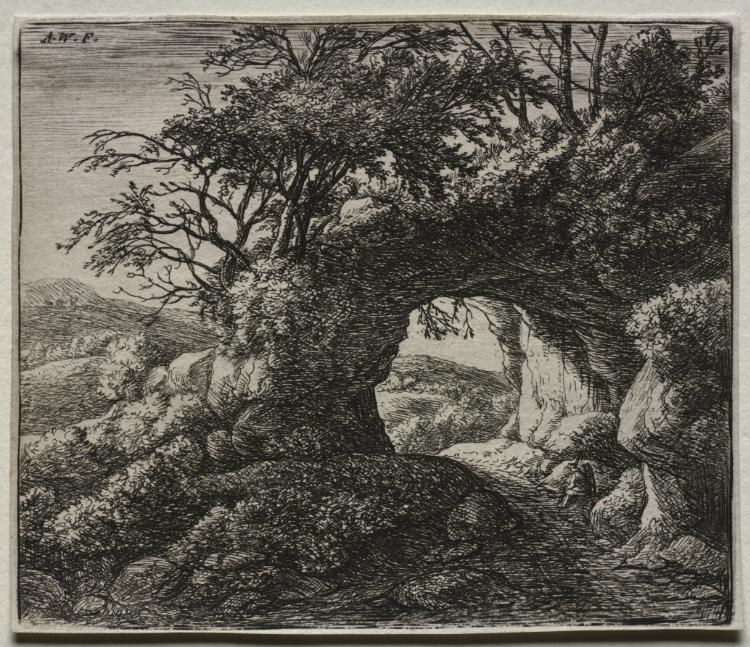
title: Four Landscapes: The Pierced Rock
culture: Netherlands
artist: Anthonie Waterloo (Dutch, 1609/10–1690)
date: 1637–90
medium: etching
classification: Print